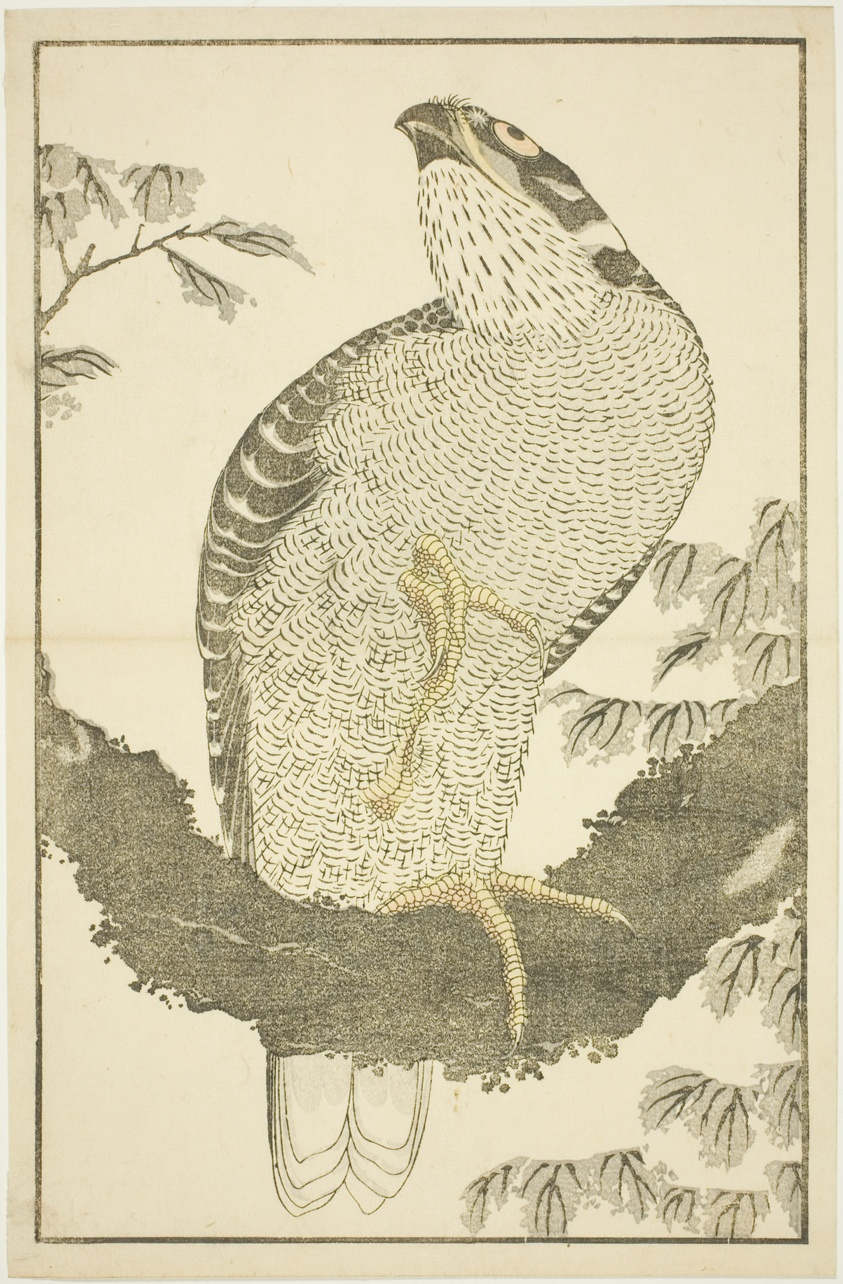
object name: Print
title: Hawk, from The Picture Book of Realistic Paintings of Hokusai (Hokusai shashin gafu)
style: Japanese (culture or style)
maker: Katsushika Hokusai 葛飾 北斎; Japanese, 1760-1849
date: c. 1814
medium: Color woodblock print (album sheet)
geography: Japan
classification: woodblock print; print; asian art